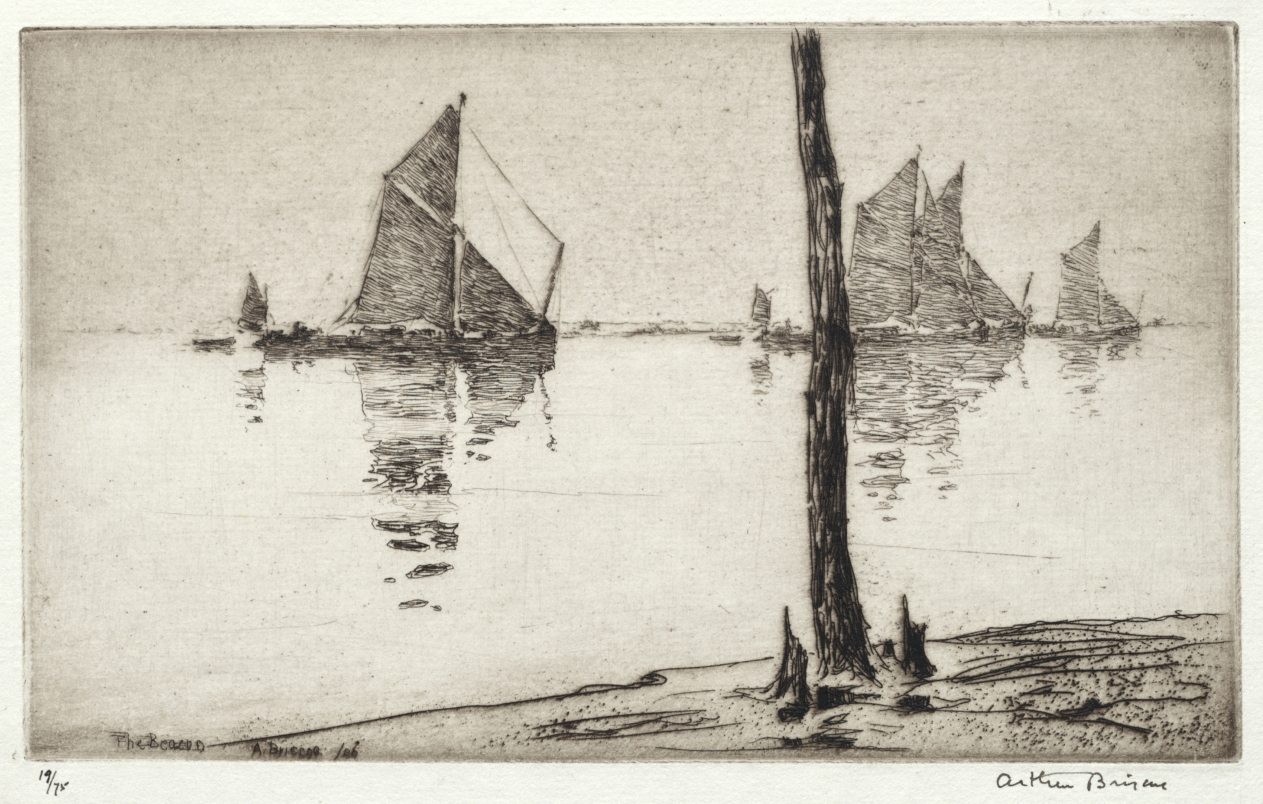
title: The Beacon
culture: England, 20th century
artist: Arthur John Trevor Briscoe (British, 1873–1943)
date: 1925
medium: etching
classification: Print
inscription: Lower margin, in ink: 19/75 Arthur Briscoe